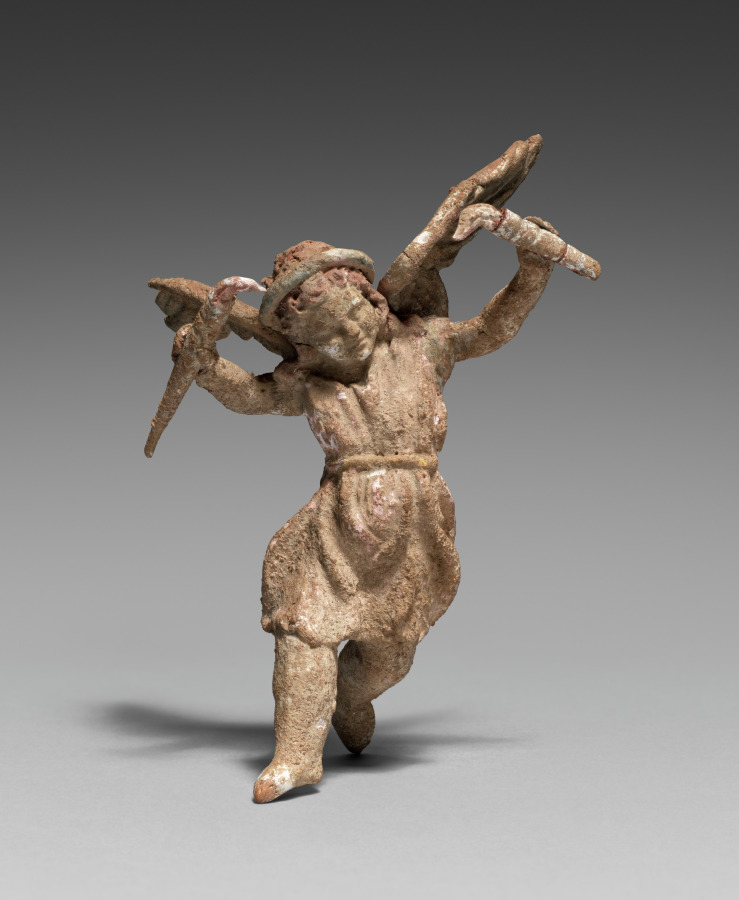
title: Figurine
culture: Greece, Myrina, Hellenistic Period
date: 300–100 BCE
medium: terracotta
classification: Sculpture